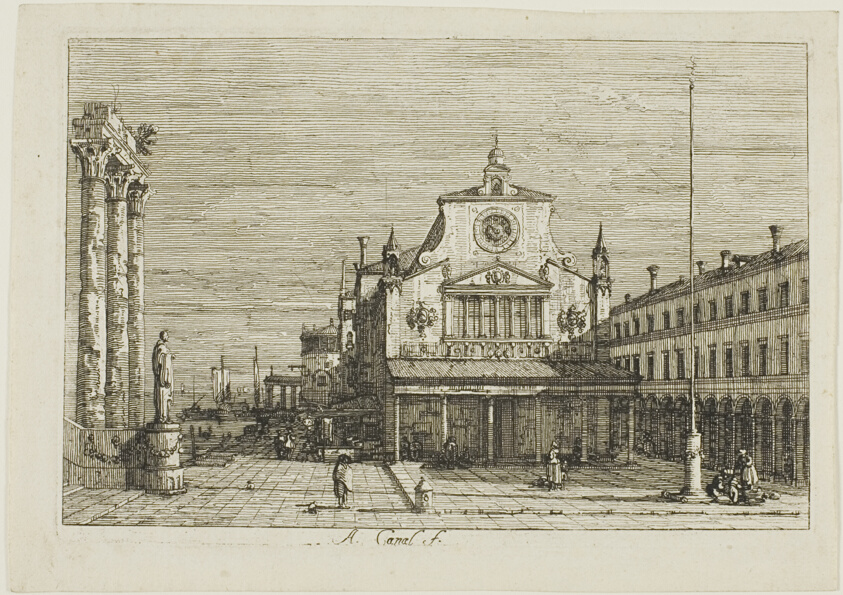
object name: Print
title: Imaginary View of S. Giacomo di Rialto, from Vedute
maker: Canaletto (Italian, 1697-1768)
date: 1735/44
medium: Etching in black on ivory laid paper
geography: Italy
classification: etching; print; prints and drawing